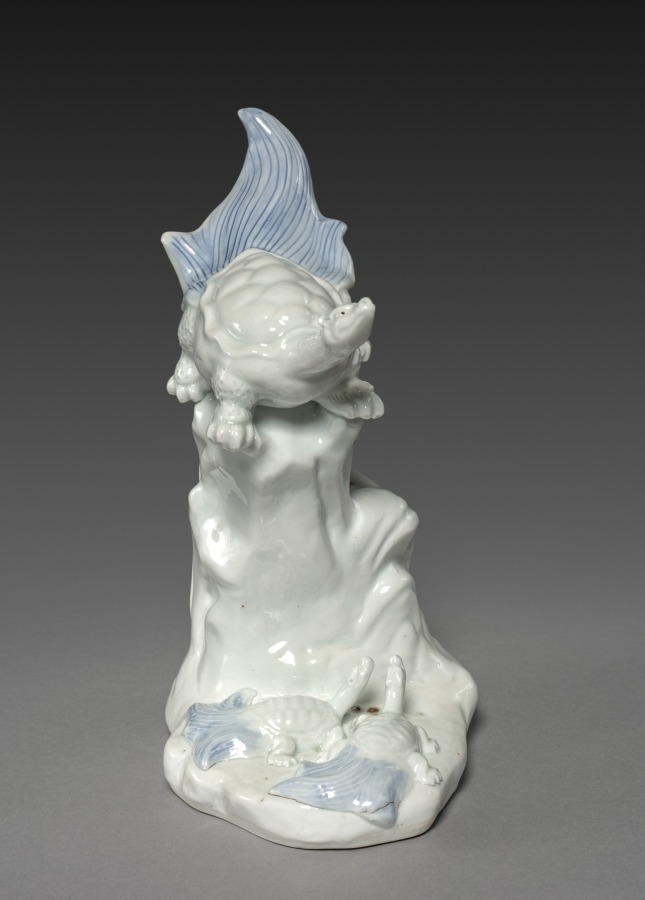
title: Tortoises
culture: Japan, Edo period (1615–1868)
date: early to mid-1800s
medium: porcelain, molded and carved, with underglaze blue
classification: Ceramic